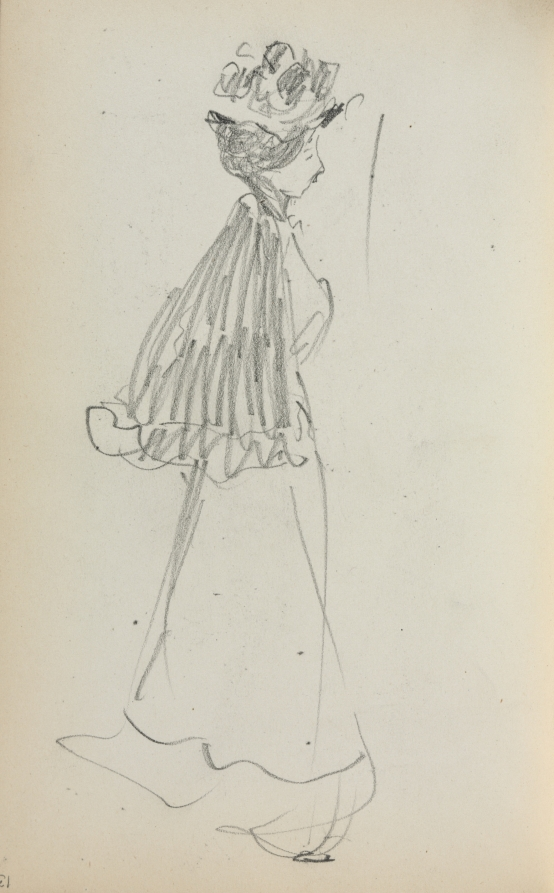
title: Italian Sketchbook: Standing Woman in profile (page 130)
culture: America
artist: Maurice Prendergast (American, born Newfoundland [now Canada], 1858–1924)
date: 1898–1899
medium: pencil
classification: Bound Volume